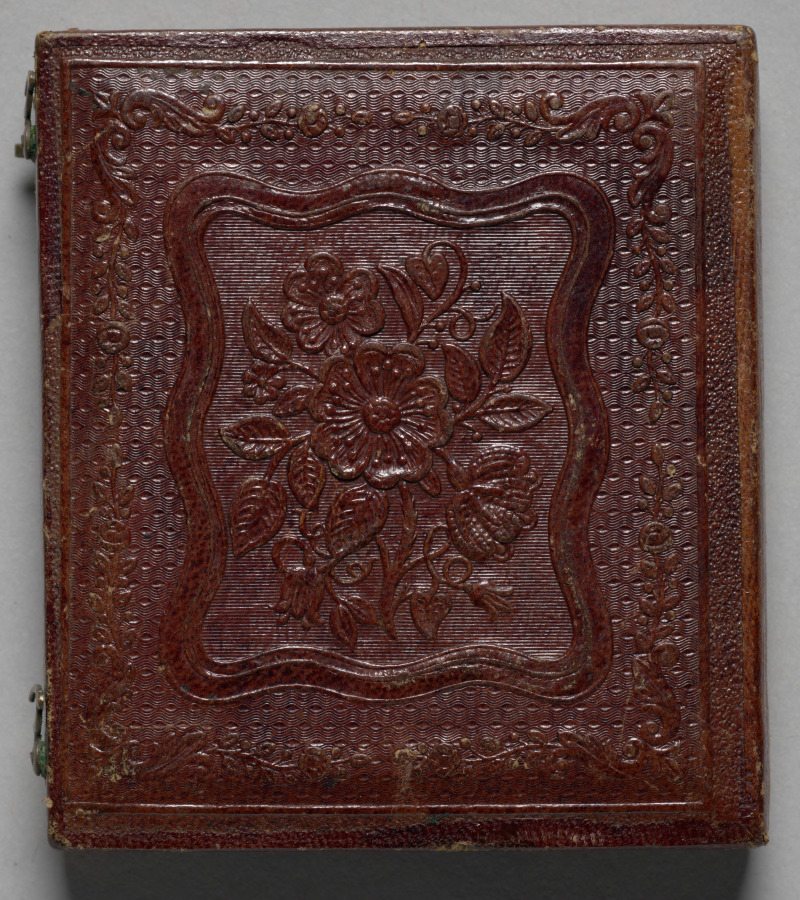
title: Crowd with sleigh in front of LL & ER Smith store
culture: America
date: c. 1858–65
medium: ambrotype, sixth plate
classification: Photograph